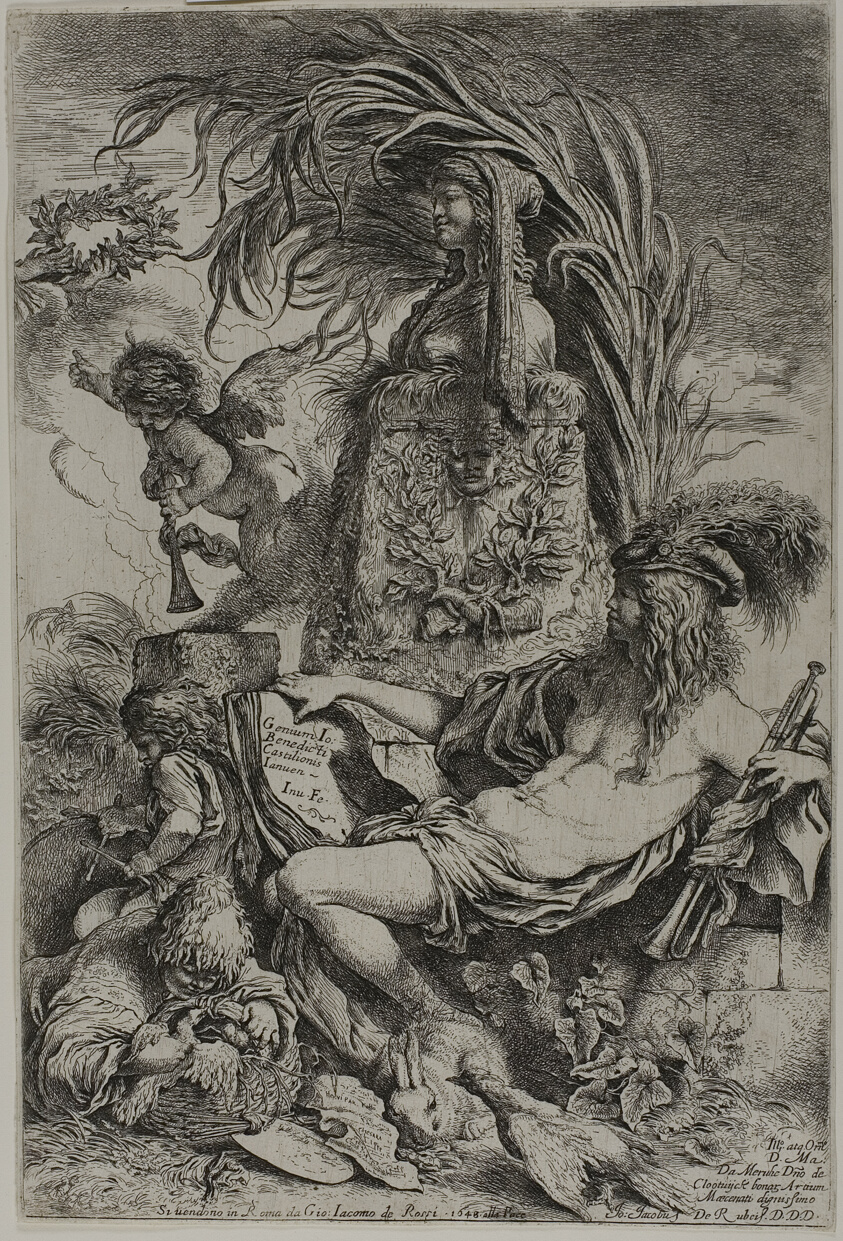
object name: Print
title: The Genius of Castiglione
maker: Giovanni Benedetto Castiglione (Italian, 1609-1664); published by Giovanni Giacomo de Rossi (Italian, 1627–1691)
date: 1645–47, published 1648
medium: Etching in black on ivory laid paper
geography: Italy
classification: etching; print; prints and drawing